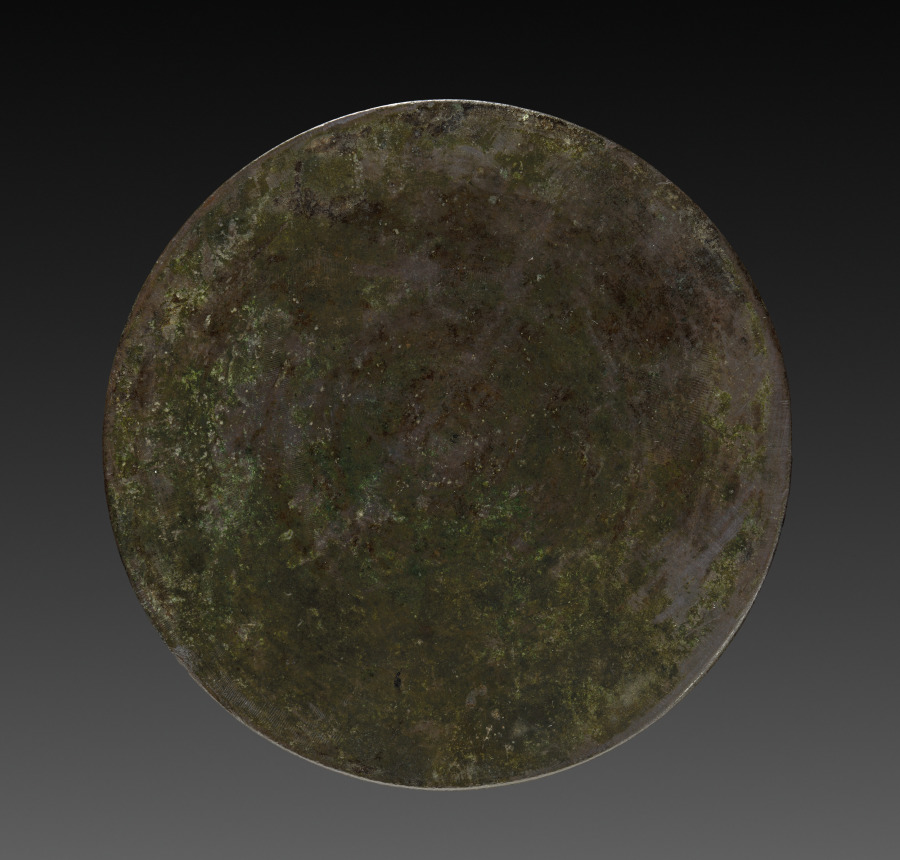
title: Mirror with Pair of Birds in Landscape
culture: Japan, Muromachi period (1392–1573)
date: 1392–1573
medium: bronze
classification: Metalwork